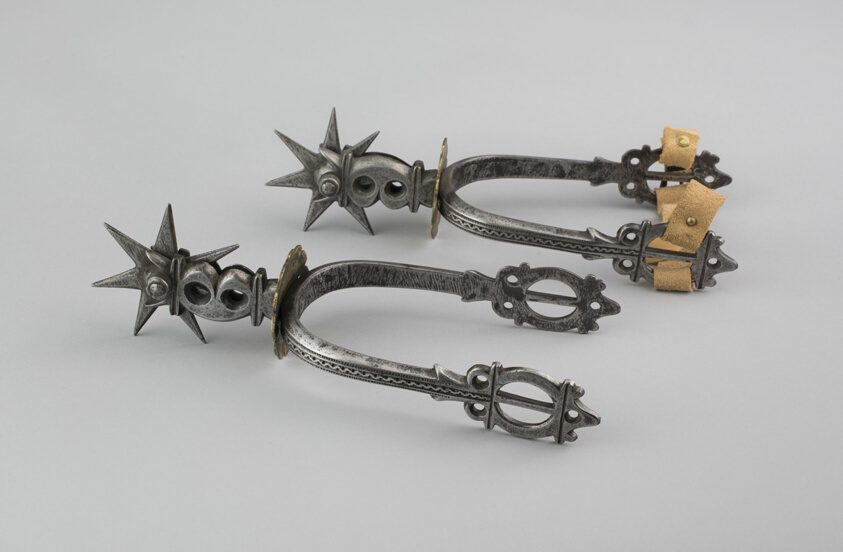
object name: Armor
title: Pair of Spurs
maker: French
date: 19th century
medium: Iron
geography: France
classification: horse equipment; armor; arms and armor